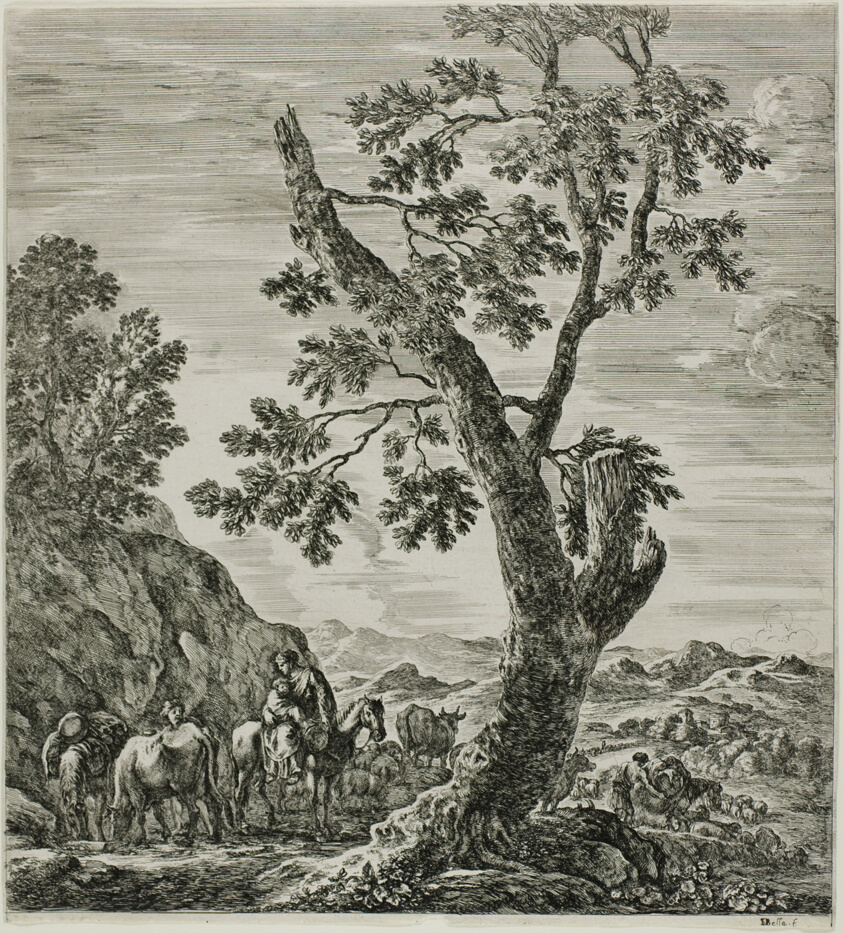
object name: Print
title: Mounted Peasant with a Child in Her Arms, plate six from The Six Large Views of Rome and the Campagna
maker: Stefano della Bella (Italian, 1610-1664)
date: 1654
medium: Etching on ivory laid paper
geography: Italy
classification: etching; print; prints and drawing